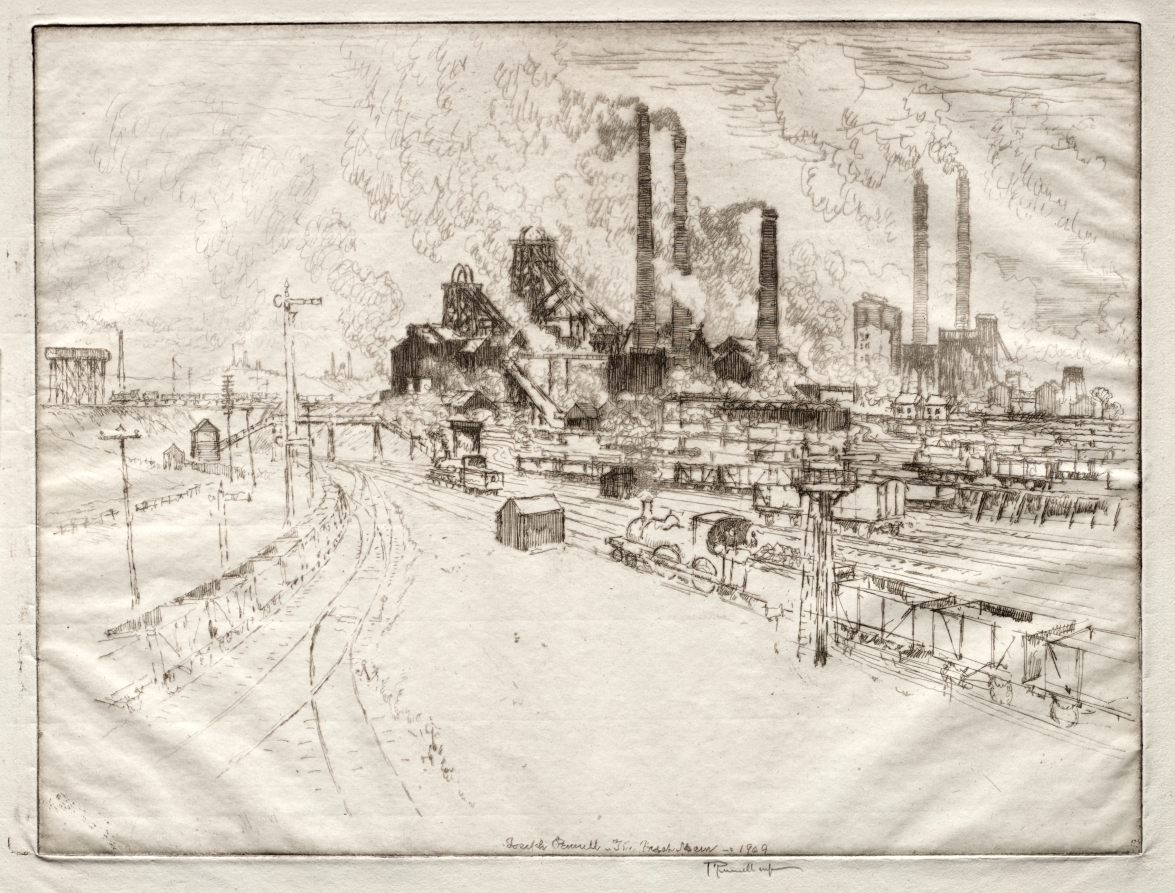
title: The Great Main, Near Sheffield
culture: America, late 19th-early 20th Century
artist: Joseph Pennell (American, 1857–1926)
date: 1909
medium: etching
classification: Print